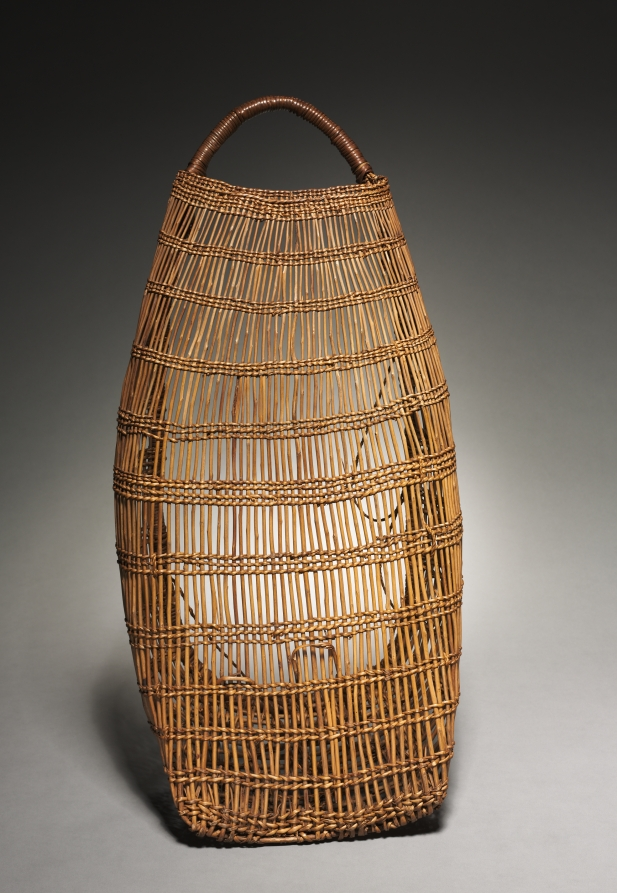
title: Cradle Basket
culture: California, Yurok or Hupa, Late 19th century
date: c 1875– 1910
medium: twined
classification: Basketry